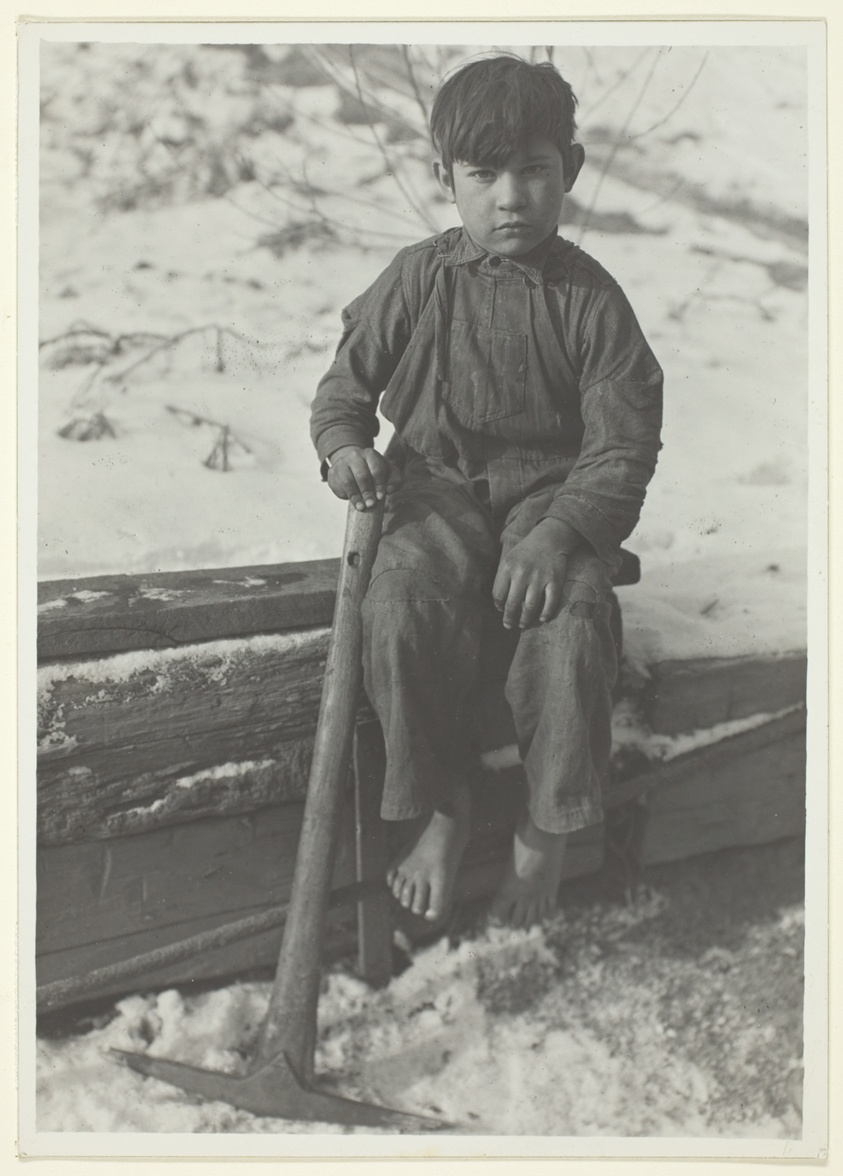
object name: Photograph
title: Miner's Boy, Scott's Run, West Virginia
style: Photo League, 20th Century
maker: Lewis Wickes Hine (American, 1874–1940)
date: 1936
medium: Gelatin silver print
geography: United States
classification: gelatin silver (developing-out-paper) pr; photographic process; photography; photograph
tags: Collected by Hugh Edwards, documentary